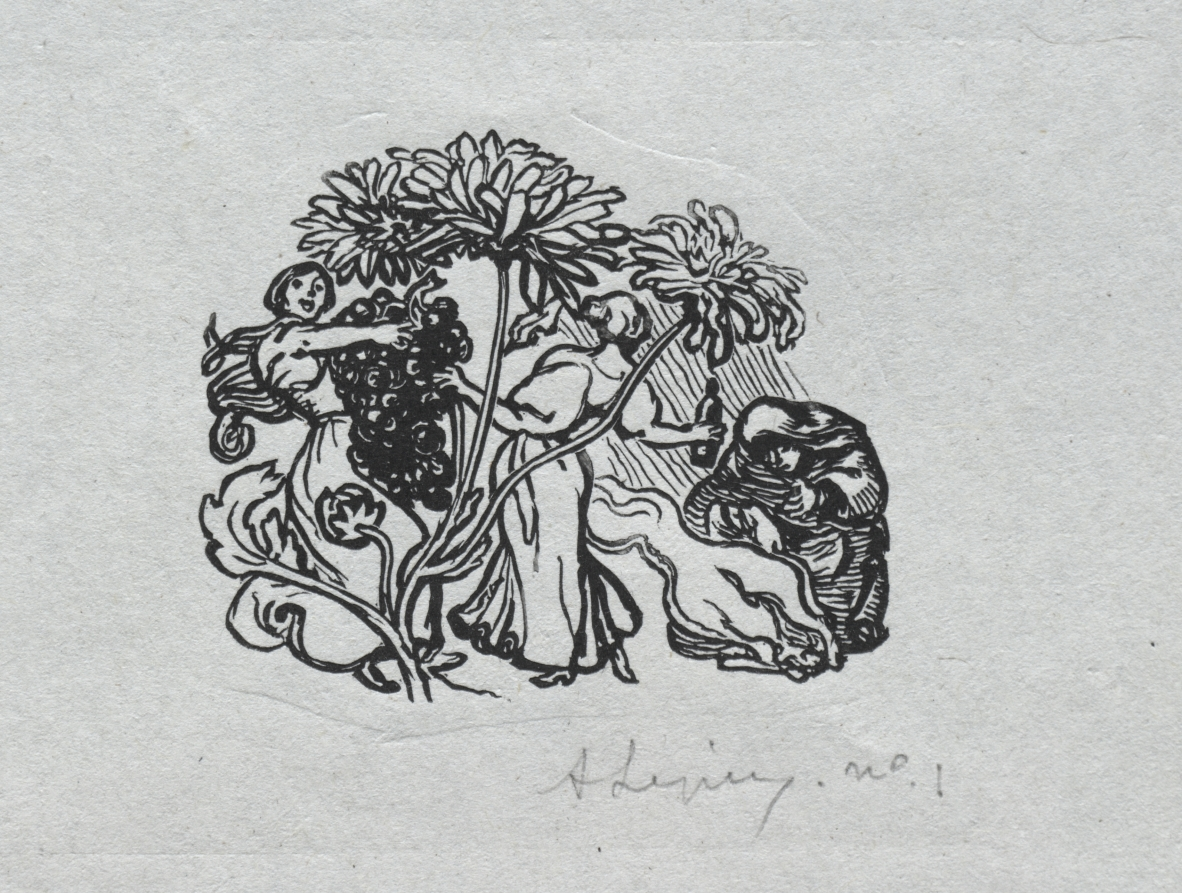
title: Paris Almanac, 1897: Tail-piece, Autumn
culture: France, late 19th Century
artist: Auguste Louis Lepère (French, 1849–1918)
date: 1897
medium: wood engraving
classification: Print